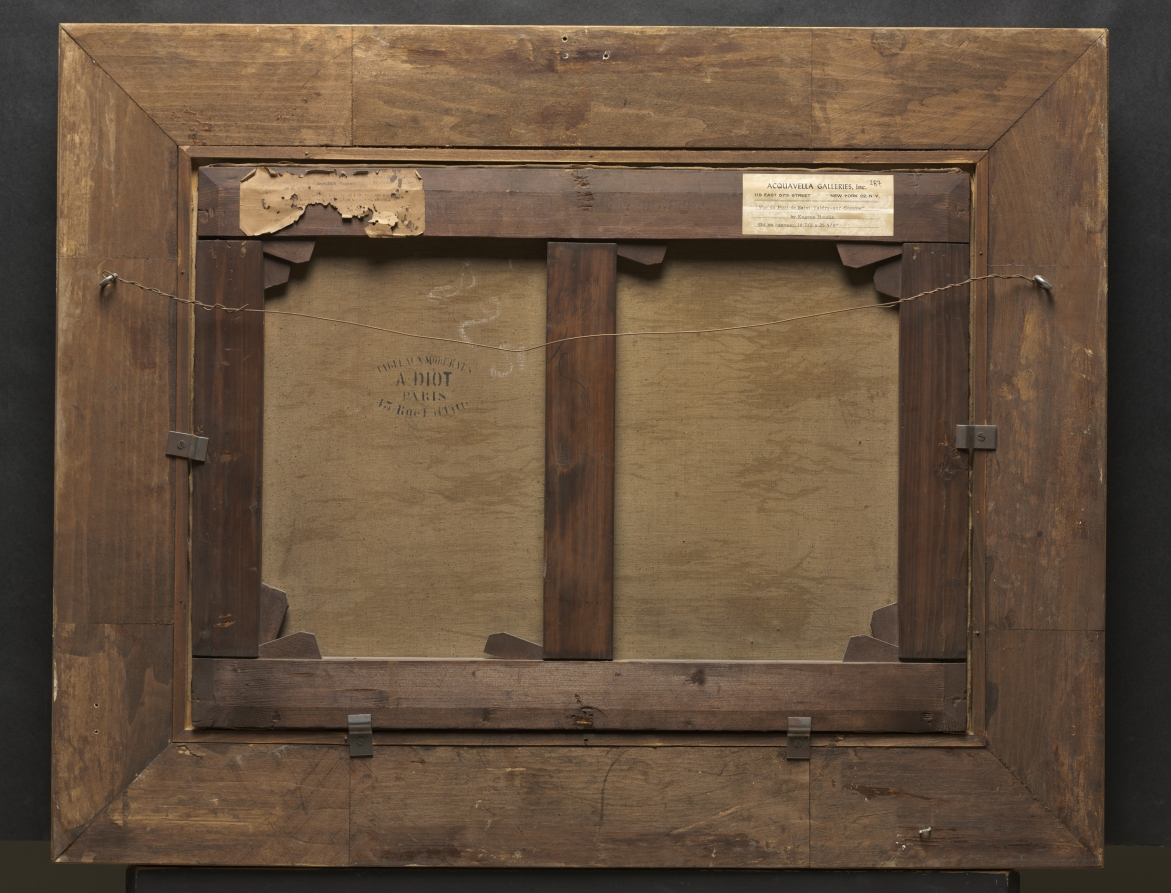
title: View of the Port of Saint-Valéry-sur-Somme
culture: France, 19th century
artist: Eugène Boudin (French, 1824–1898)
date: 1891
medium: oil on canvas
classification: Painting